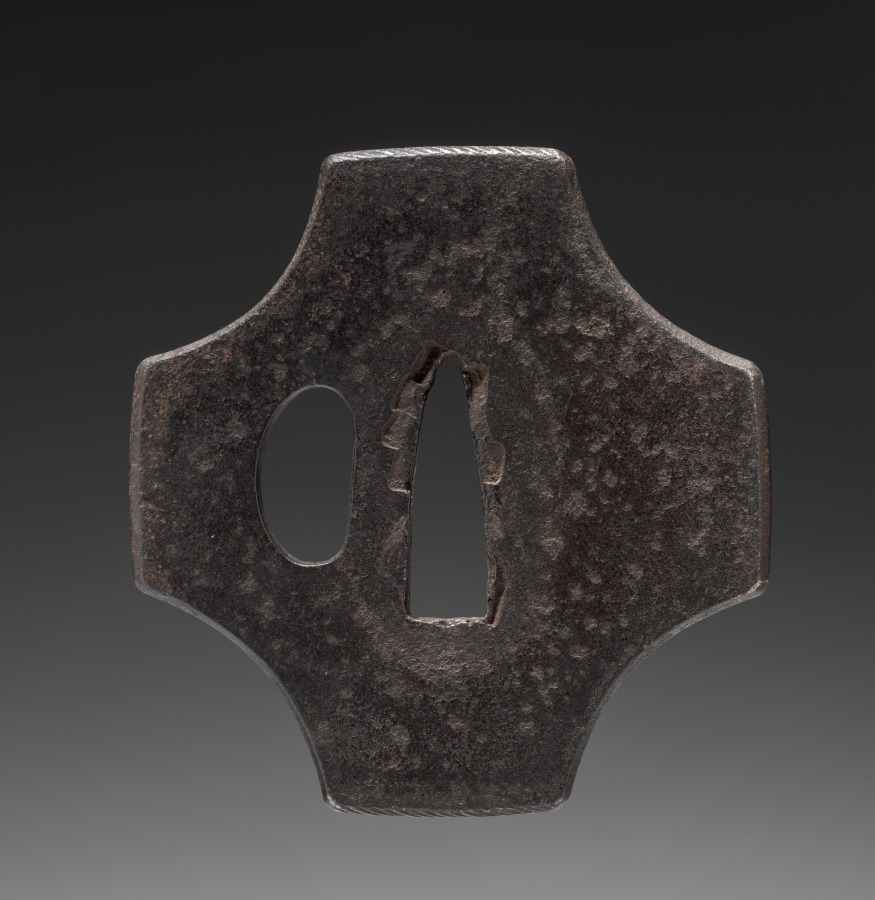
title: Sword Guard (Tsuba)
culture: Japan, possibly Edo period (1615-1868)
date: c. 1615–1868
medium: iron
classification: Arms and Armor